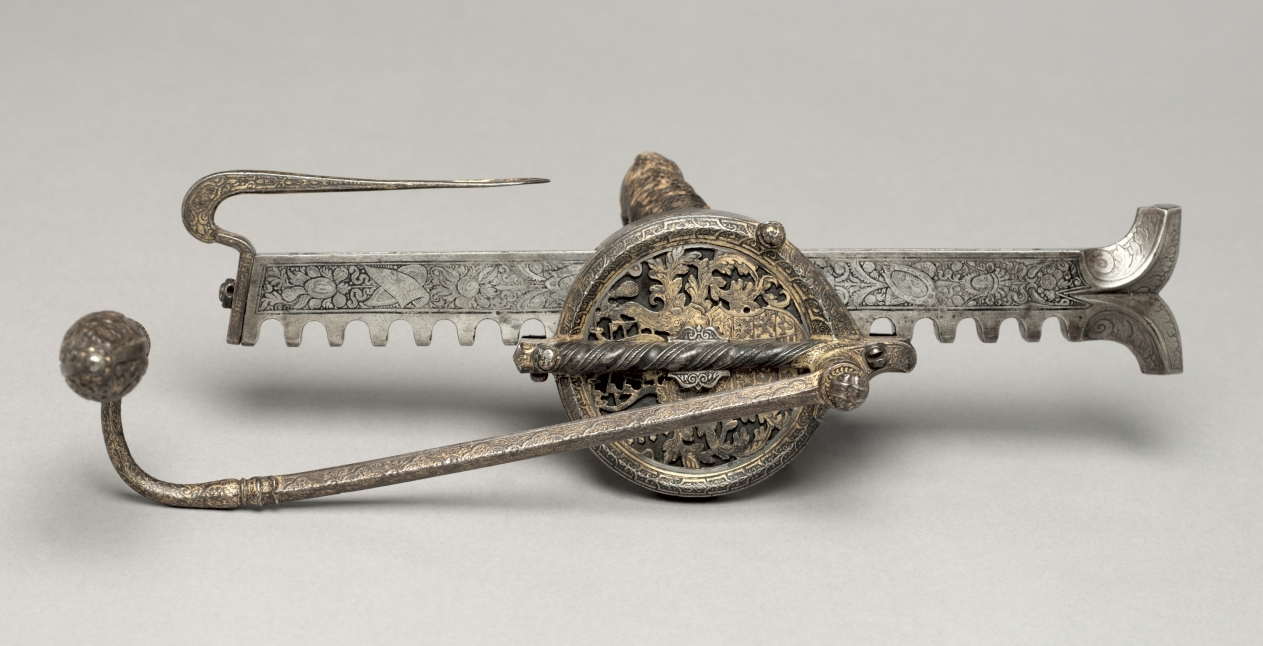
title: Cranequin with Arms of Elector Augustus I of Saxony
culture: Germany, Saxony, 16th century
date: c. 1553–73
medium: steel; etched, chased and gilded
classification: Arms and Armor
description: This winder or cranequin was for Prince Elector Augustus I, a member of the ruling elite in the Holy Roman Empire. Augustus, powerful and wealthy, had even the most practical instruments ornately decorated, including this cranequin.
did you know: Augustus was a marksman who took part in crossbow competitions. He had a large collection and often gave them to friends.